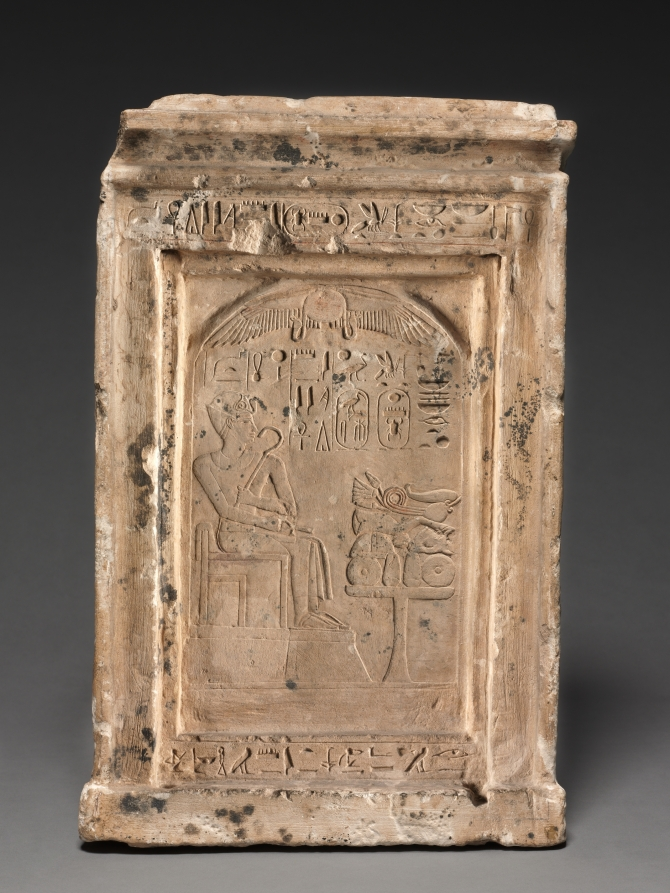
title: Domestic Shrine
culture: Egypt, Thebes(?), New Kingdom (1540–1069 BCE), Dynasty 18, reign of Tuthmosis III (1479–1425 BCE)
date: c. 1479–1425 BCE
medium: limestone, originally painted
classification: Sculpture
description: Used in the home like an icon, this shrine was originally provided with two wooden doors, hinged at each side and bolted in the center. The upper and lower sockets for the pivots of these doors still survive. The worshiper opened the doors to reveal the representation of King Tuthmosis III seated in front of an offering table. The hieroglyphic inscription at the base tells us that the shrine was made for the tomb worker Amenemheb. The carving is clearly in the style of Tuthmosis III’s reign, showing that such objects of private veneration were produced during the king‘s lifetime.